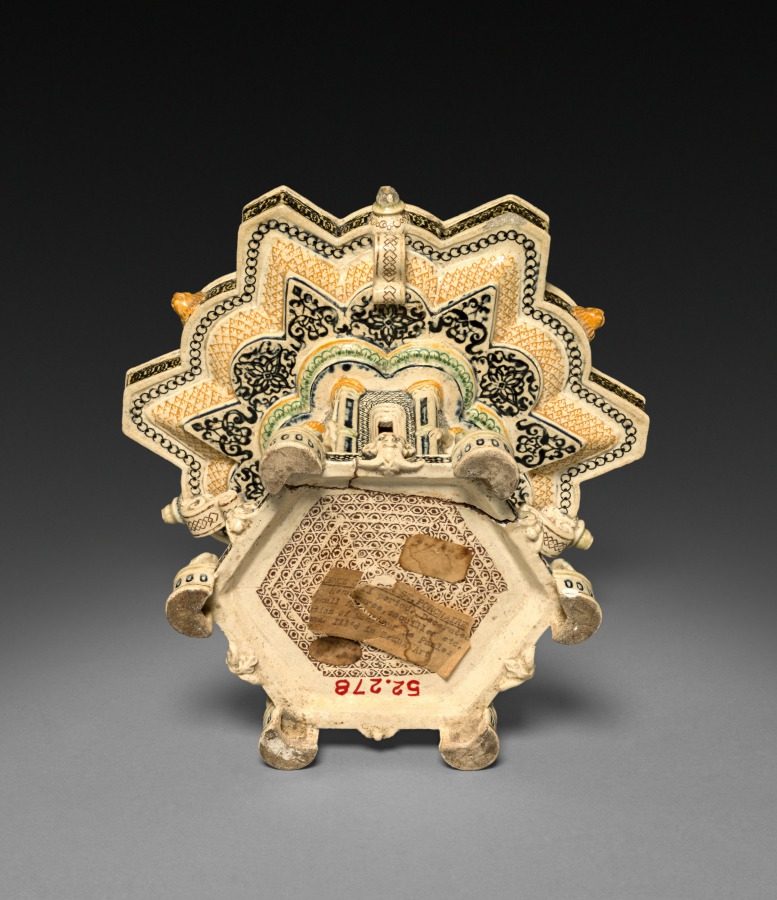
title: Pedestal Dish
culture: France, 19th century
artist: after Saint-Porchaire (French)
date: 1800s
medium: white earthenware with inlaid decoration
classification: Ceramic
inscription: in center of dish, arms and crown of France encircled by chain of Order of St. Louis, around which are interlaced initials DDH [monogram of Henri II] and three interlaced crescents (device of Diane de Poitiers).